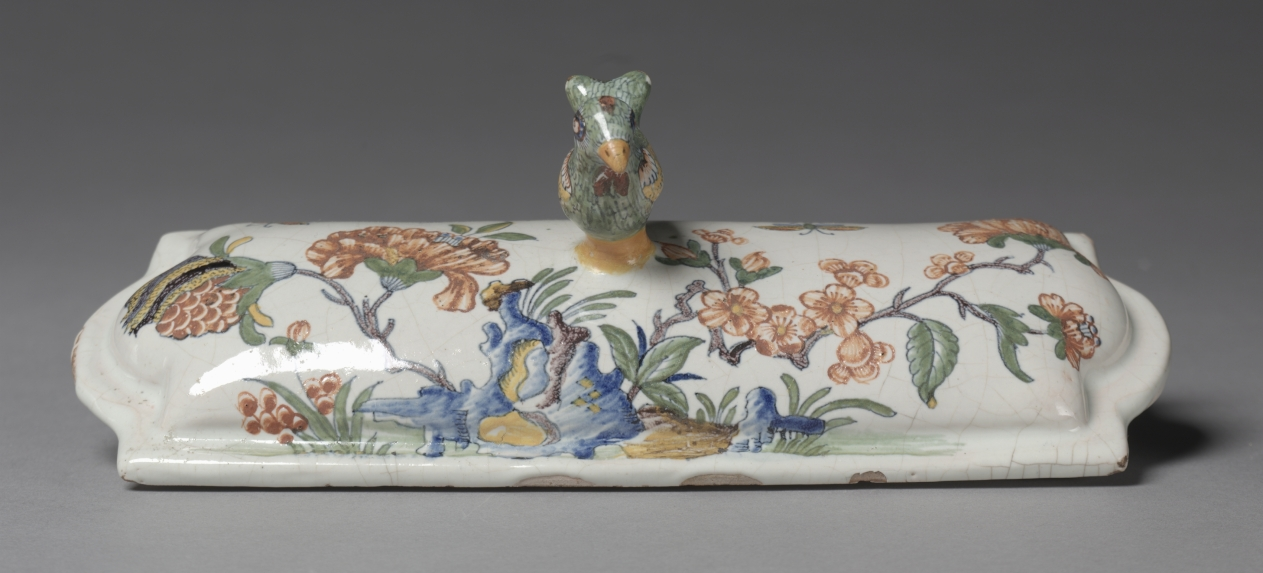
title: Writing Stand with Inkwells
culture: France, Sinceny, 18th century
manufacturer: Sinceny Factory (French)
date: 1746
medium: Tin-glazed earthenware (faience) with enamel decoration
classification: Ceramic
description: The faience factory at Sinceny was an offshoot of that at Rouen. In style, Sinceny closely resembles later Rouen wares with polychrome decoration. The stylized flowers and insects which decorate this writing stand are entirely typical of Sinceny faience.